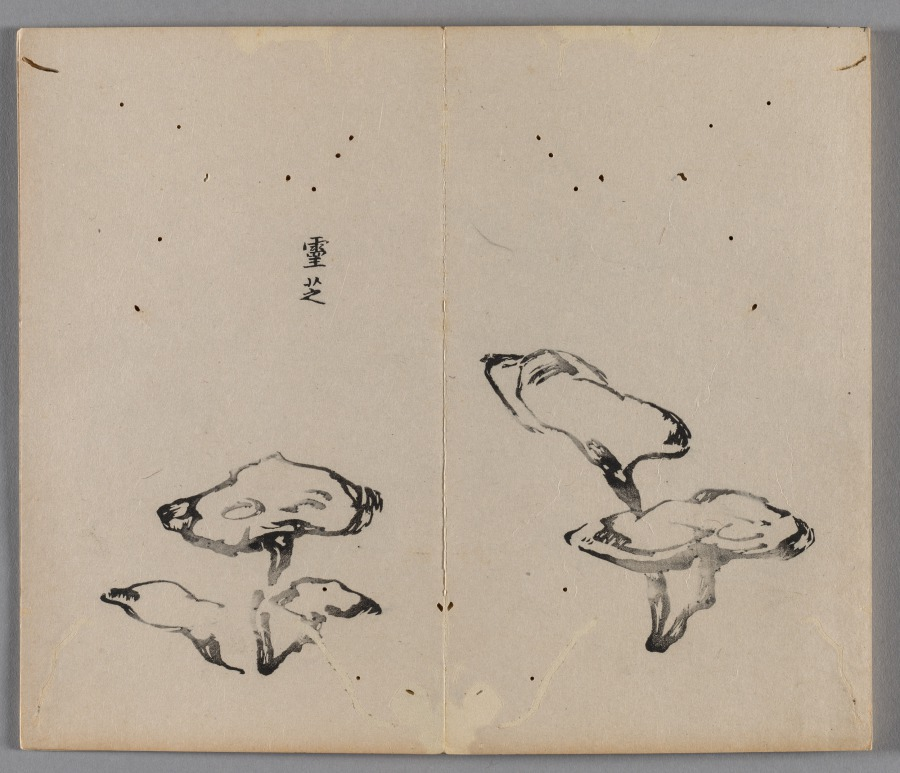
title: Ten Bamboo Studio Painting and Calligraphy Handbook (Shizhuzhai shuhua pu): Orchids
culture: China, Qing dynasty (1644-1911)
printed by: Hu Zhengyan (Chinese, c. 1584–1674)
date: 1633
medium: Woodblock-printed book; ink and colors on paper; first edition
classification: Print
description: Color printing reached a level of perfection in the early 1600s, as seen in this Ten Bamboo Studio Collection of Calligraphy and Painting and the Mustard Seed Garden Manual of Painting (printed 1679 and 1701). The painterly quality, precision in registering (aligning) the woodblocks, and harmonious colors made them the most successful color print editions in Chinese history. Both editions were printed and compiled in Nanjing, spread nationwide, and had a great impact on the arts in Japan and Korea.